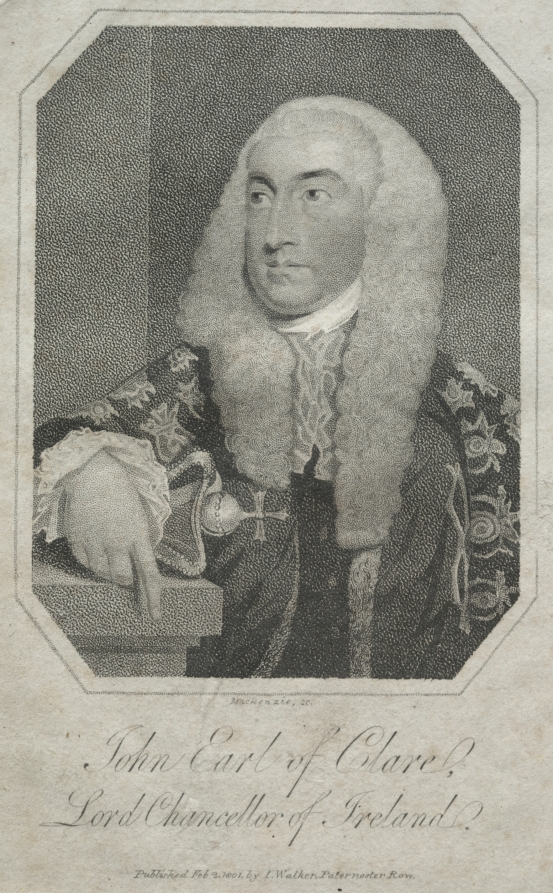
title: John Fitzgibbon, Earl of Clare (1749-1802)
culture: England, early 19th Century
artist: Mackenzie (British)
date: 1801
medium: stipple engraving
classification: Print